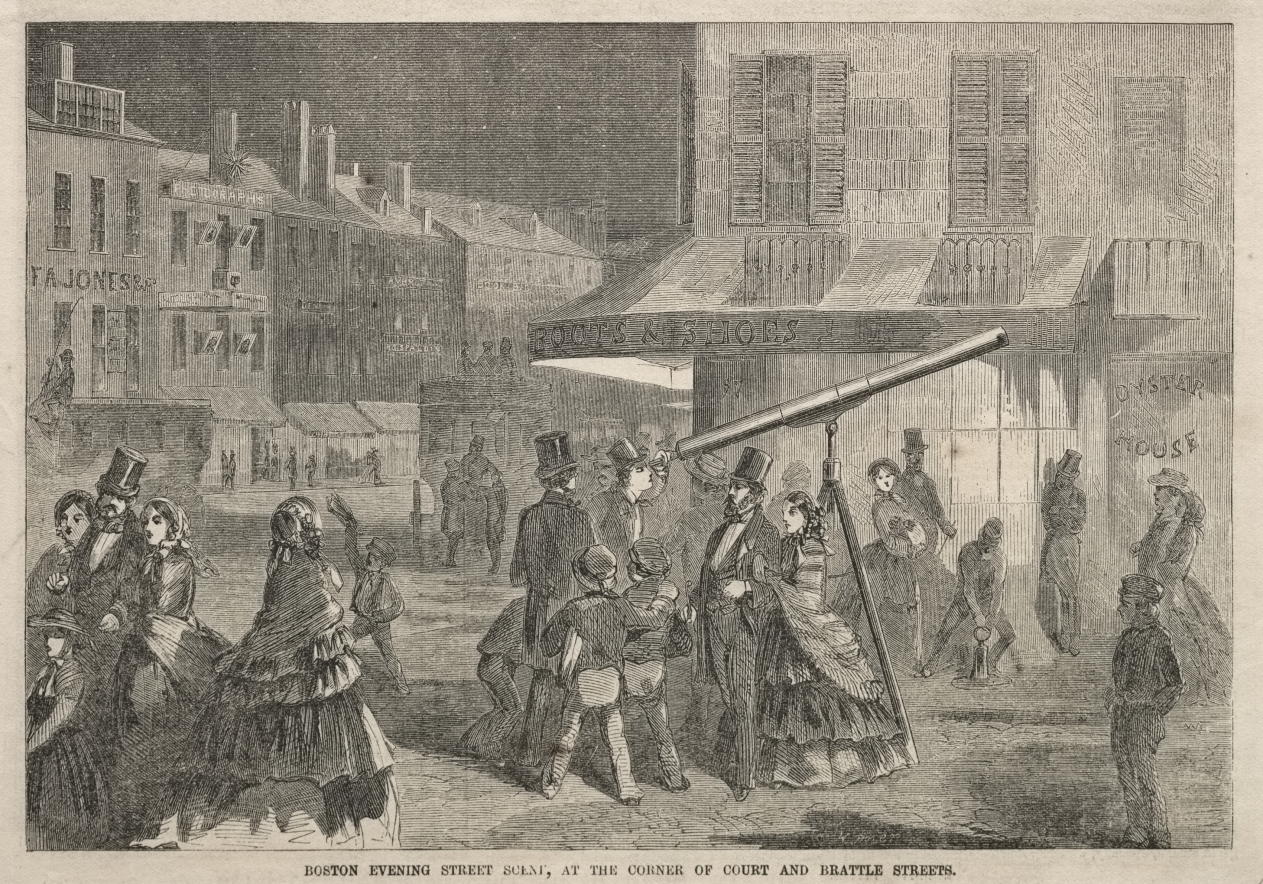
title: Boston Evening Street Scene, at Corner of Court and Brattle Streets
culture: America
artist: Winslow Homer (American, 1836–1910)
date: 1857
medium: wood engraving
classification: Print